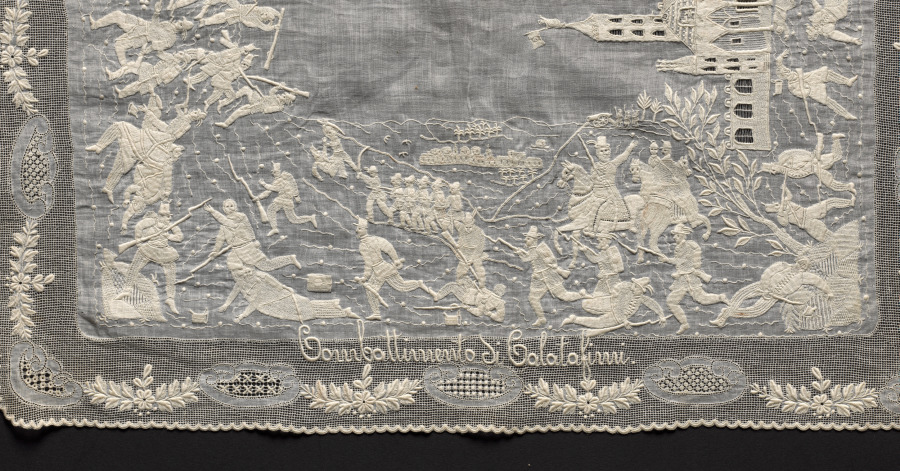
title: Lace Handkerchief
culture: Italy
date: 1850–99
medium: Plain weave cotton (est.): needle lace (cutwork and drawnwork) and embroidery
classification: Embroidery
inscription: on one side: "Combattimento di Calatafimi" and on the other: "L'eroe Garibaldi in Palermo."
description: The embroidery on this handkerchief depicts the Battle of Calatafini in 1860 and the hero Garibaldi in Palermo. The inscription reads: Combattimento di Calatafini" and L'erce Garibaldi in Palermo."